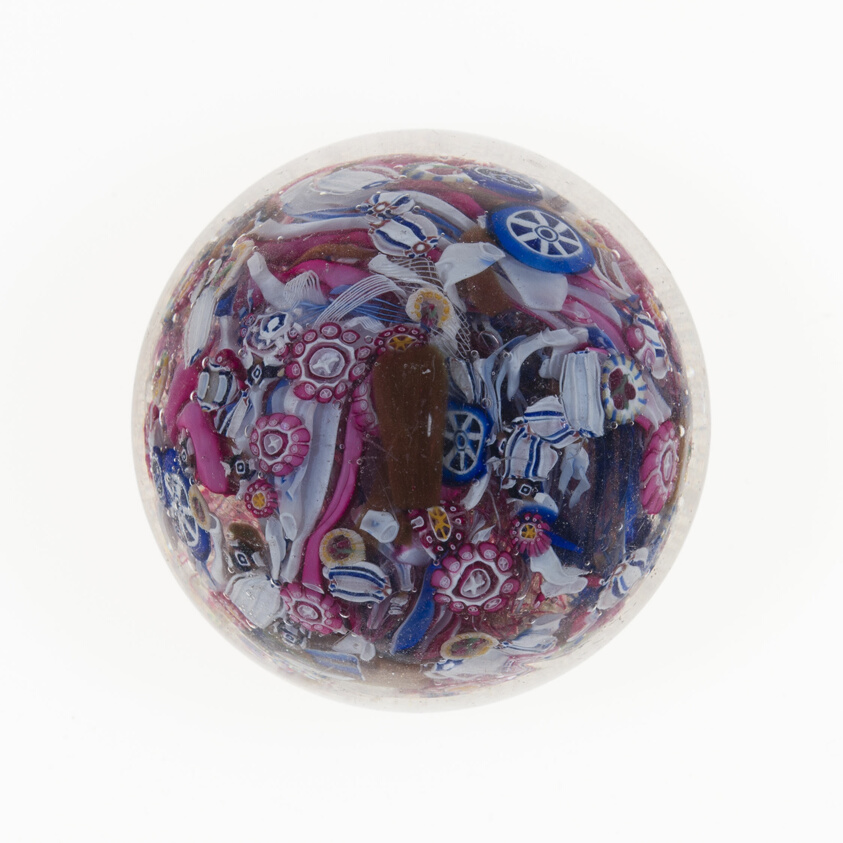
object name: Glass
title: Paperweight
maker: Pietro Bigaglia (Italian, 1786-1878)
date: 1846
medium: Glass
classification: paperweight; glass